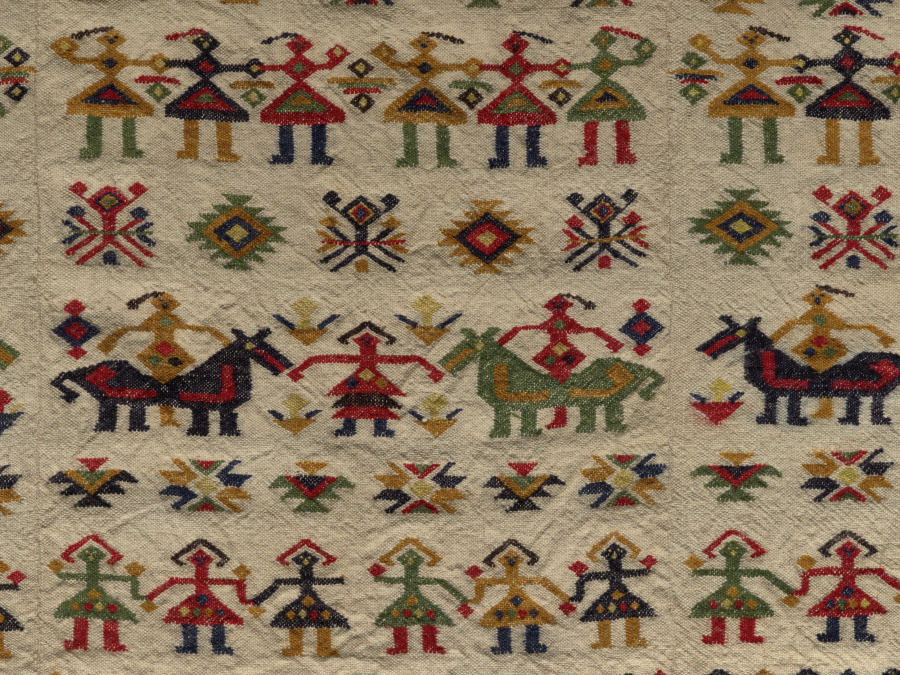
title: Blanket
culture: Greece, Crete, 19th century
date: 1800s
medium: wool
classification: Textile